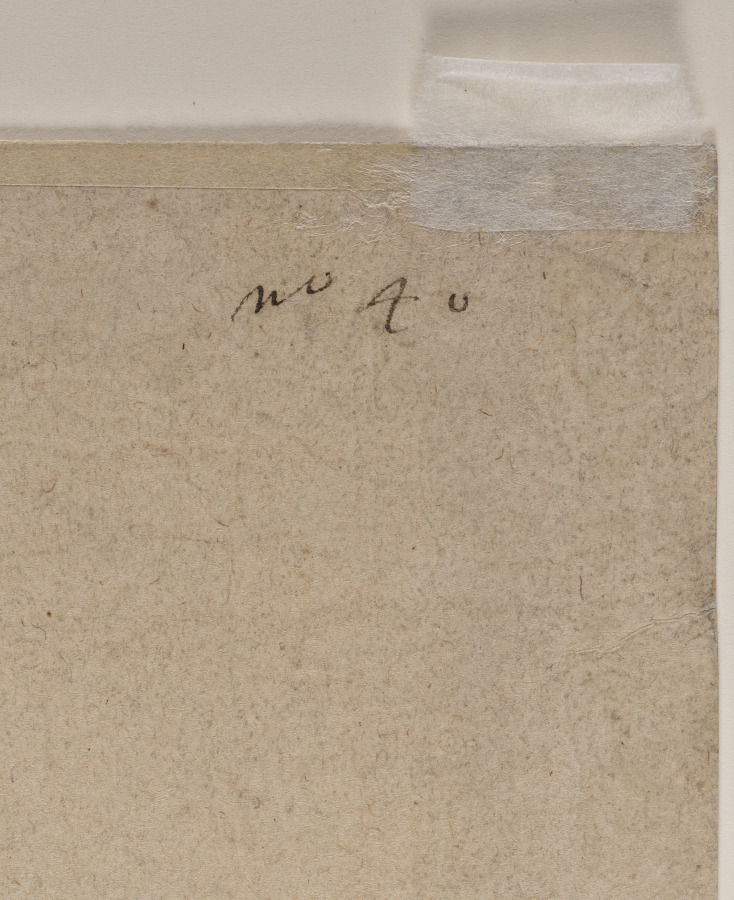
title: A Faun Grasping a Bunch of Grapes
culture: Flanders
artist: studio of Peter Paul Rubens (Flemish, 1577–1640)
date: after 1616–18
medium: black chalk and brush and brown wash; framing lines in pen and black ink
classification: Drawing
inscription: VERSO, upper right, in brown ink: no 40 ; lower left, in brown ink: 6/14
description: This drawing relates to a finished painting (now lost) by Peter Paul Rubens that depicted a faun (a woodland creature similar to a satyr) squeezing grapes into the mouth of a young Bacchus. That figure, shown here, could be Silenus, who educated Bacchus on the pleasures of wine, revelry, and nature. Rubens ran a large studio and employed numerous apprentices, one of whom may have made this copy after the original painting. As a form of instruction, Rubens added ink wash to the drawing to enhance the shading on the figure and shadows behind it.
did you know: Swirling draperies like the one haphazardly worn by this faun do more than conceal, in many cases they reveal an artist's technical skill. To render folds and gathers in fabric, artists used chiaroscuro, meaning contrasting light and dark tones.